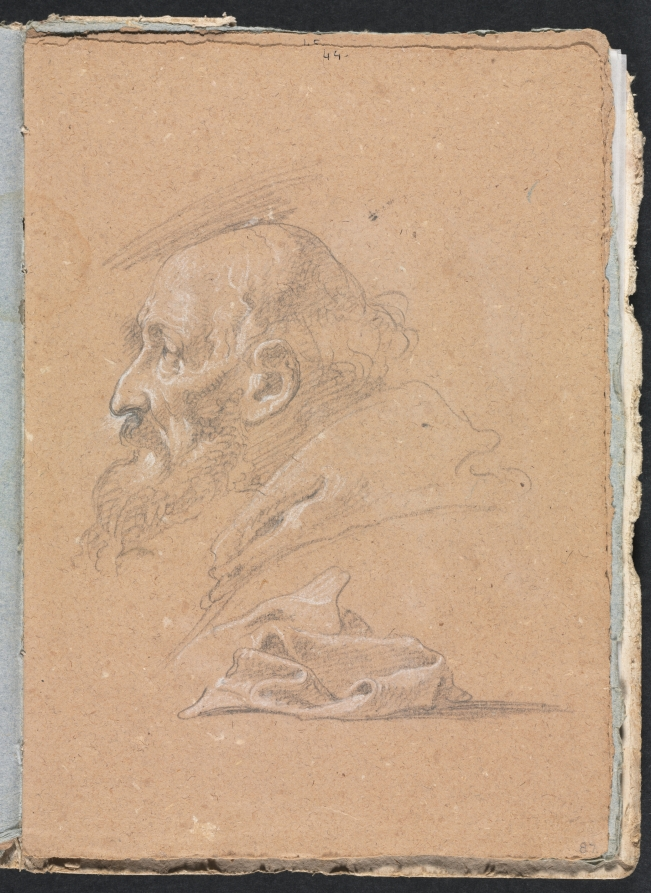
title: Verona Sketchbook: Monk in profile with drapery (page 87)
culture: Italy, 18th century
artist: Francesco Lorenzi (Italian, 1723–1787)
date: 1760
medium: black chalk with white heightening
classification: Bound Volume